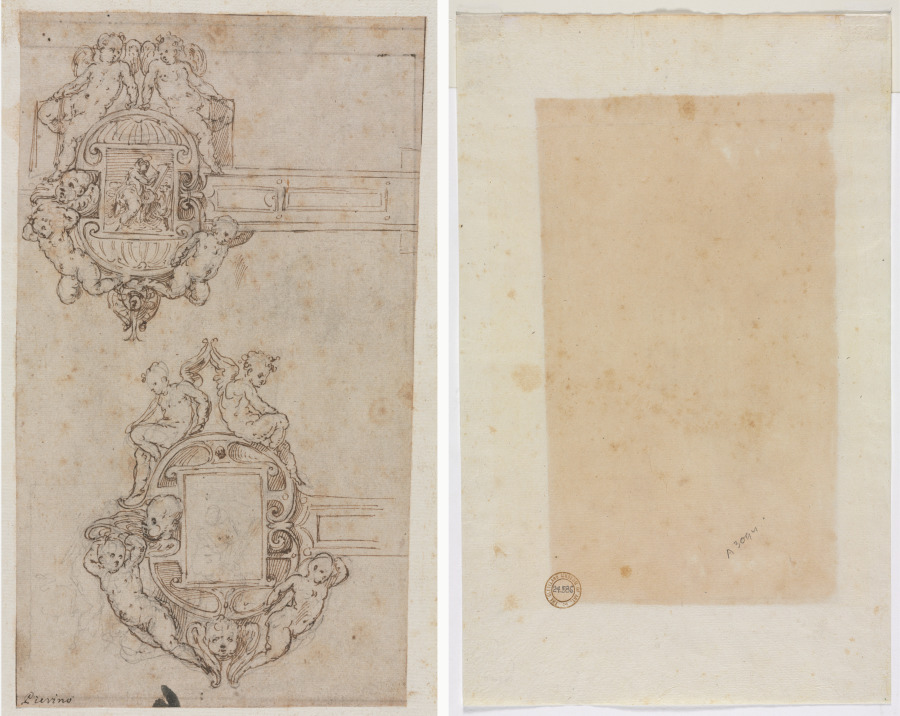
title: Design for Decorative Hinges (recto) Border Lines (verso)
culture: Italy, 16th century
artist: Luzio Romano (Italian, active 1528–75)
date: mid 1500s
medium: pen and brown ink over black chalk; framing lines in brown ink (lower left, upper right)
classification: Drawing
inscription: ower left, in brown ink: Pierino ; RECTO OF SECONDARY SUPPORT, upper right, in brown ink: 128 ; upper right, in black chalk(?): 32 ; center right, in graphite: 28 [underlined, sideways] ; lower right, in graphite: cx[l?] ; VERSO OF SECONDARY SUPPORT, lower right, in graphite: A 309[7?] . ; FRAGMENT OF OLD MAT (now removed), across top, in graphite: Pierino del Vaga (circle of) Door Hinges ; across center, in graphite: Enlarged duplicate of / drawing at Windsor Castle / A. N. [underlined] ; lower right, in graphite: 159